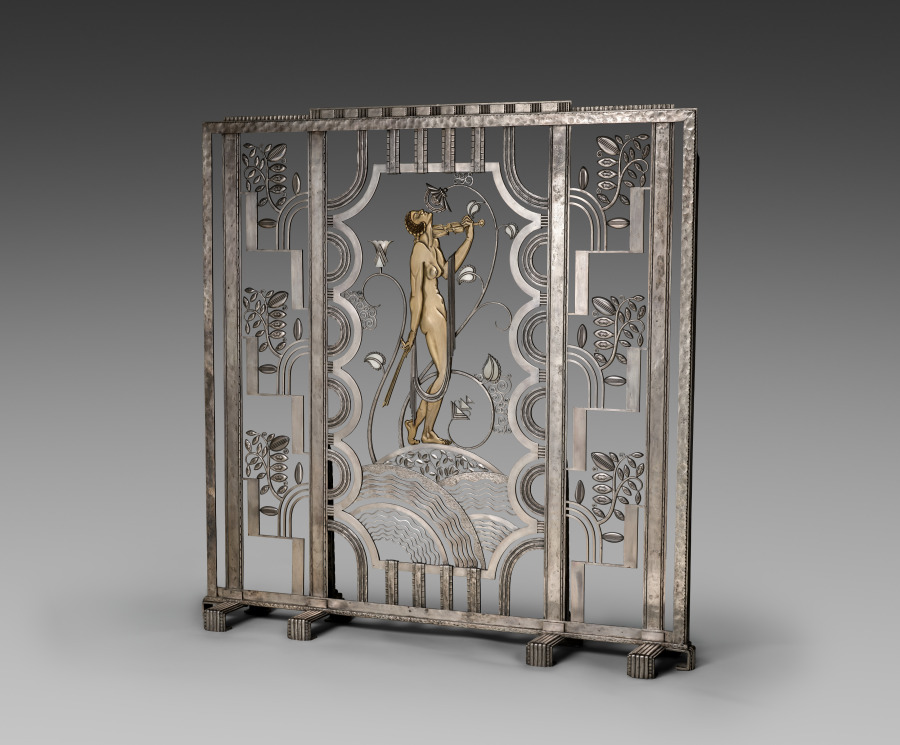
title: Muse with Violin Screen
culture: America, Ohio, Cleveland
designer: Paul Fehér (American, born Hungary, 1898–1990)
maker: Rose Iron Works (America, Ohio, Cleveland, est. 1904)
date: 1930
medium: Steel, brass; silver and gold plating, cotton velveteen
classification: Metalwork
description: Since the early years of the 20th century, the Rose Iron Works, a Cleveland supplier of architectural ornament, has produced distinguished metalwork. The company’s founder, Martin Rose, was born in Austria-Hungary and studied ornamental metalsmithing in Vienna prior to immigrating to Cleveland in 1902. In the 1920s, he hired a talented young Parisian designer, Paul Fehér, to work for the firm. Fehér’s designs, culminating in this massive screen, brought a modern European sensibility to the Rose Iron Works production. With its geometric patterning, highly stylized and abstracted natural forms, and the central figure reminiscent of the celebrated jazz singer Josephine Baker, this screen reflects the classic motifs of Art Deco design.